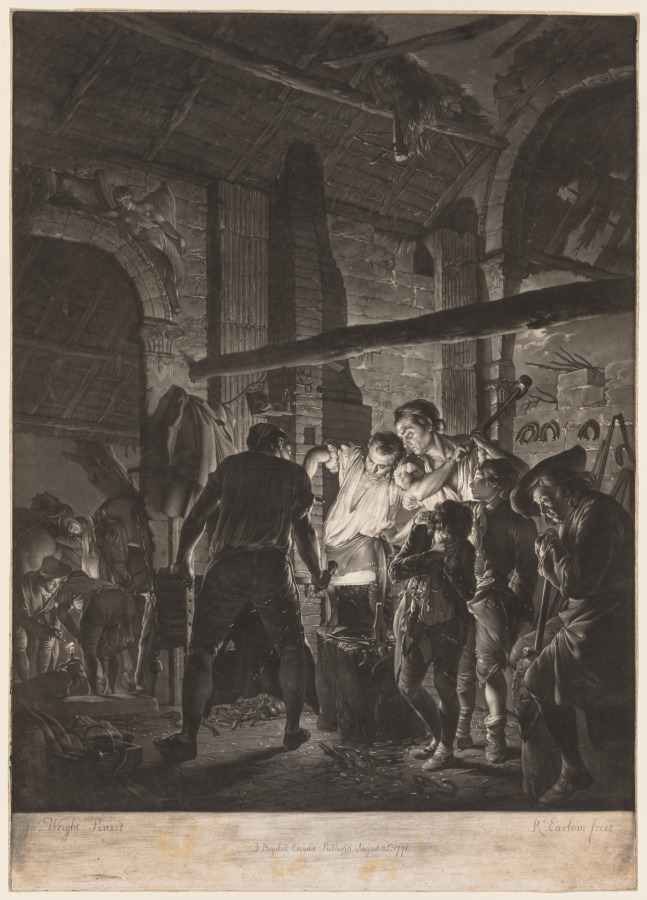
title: The Blacksmith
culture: England, 18th century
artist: Richard Earlom (British, 1743–1822)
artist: after Joseph Wright of Derby (British, 1734–1797)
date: 1771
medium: mezzotint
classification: Print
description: Joseph Wright of Derby's fame as a painter was enhanced by prints based on his compositions since works on paper, being relatively cheap and widely available, could reach a much larger audience than his oils. Filled with dramatic light effects, Wright's paintings were ideally suited for reproduction in mezzotint. With its velvety texture and subtle tonal variations ranging from rich blacks to delicate shades of gray, mezzotint was the printmaking technique closest to oil painting. Experts like Earlom or William Pether were skilled at transposing paintings into mezzotint while exploiting the unique characteristics of this medium.